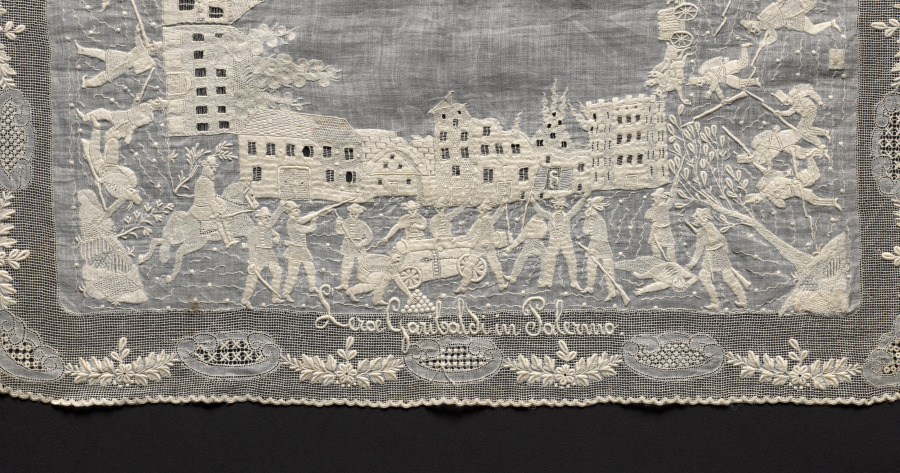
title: Lace Handkerchief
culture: Italy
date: 1850–99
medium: Plain weave cotton (est.): needle lace (cutwork and drawnwork) and embroidery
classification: Embroidery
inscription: on one side: "Combattimento di Calatafimi" and on the other: "L'eroe Garibaldi in Palermo."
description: The embroidery on this handkerchief depicts the Battle of Calatafini in 1860 and the hero Garibaldi in Palermo. The inscription reads: Combattimento di Calatafini" and L'erce Garibaldi in Palermo."